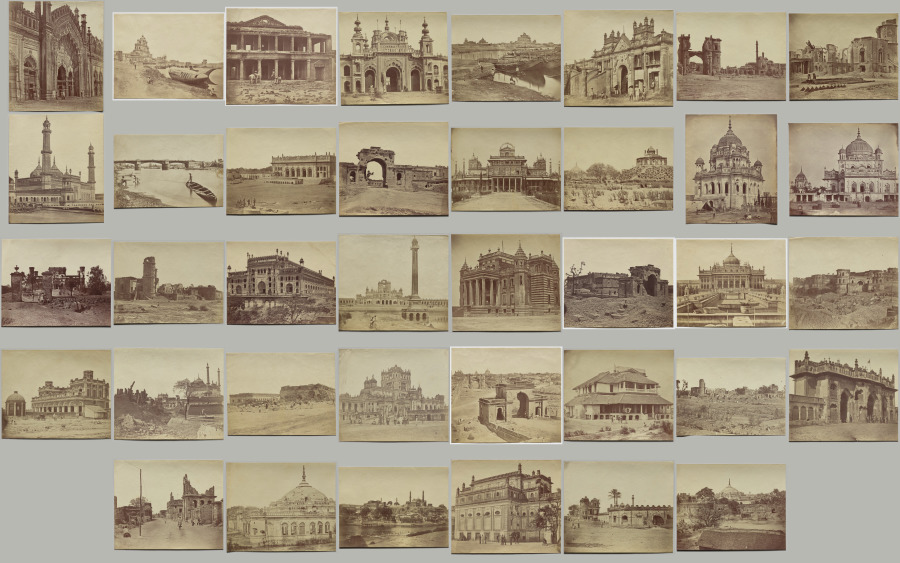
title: Lucknow After the Siege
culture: England, 19th century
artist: Felice A. Beato (British, 1832–1909)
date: 1858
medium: 38 albumen prints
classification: Photograph